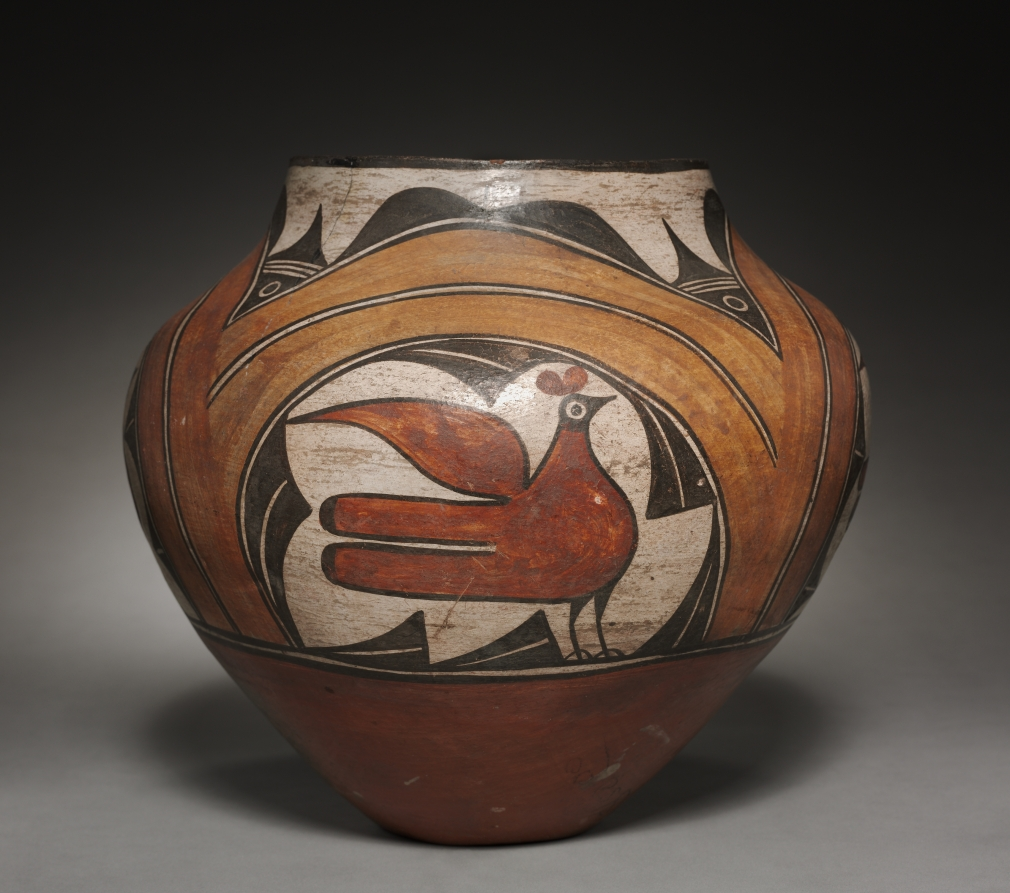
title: Water Jar/ Olla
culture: Southwest, Pueblo, Zia, Post- Contact Period, 20th century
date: 1900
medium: ceramic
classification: Ceramic